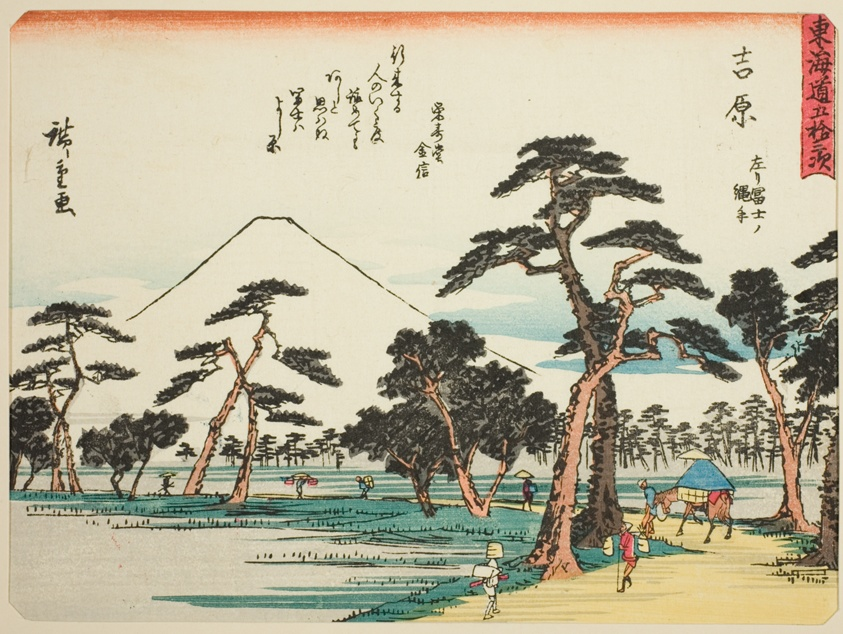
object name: Print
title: Yoshiwara: View of Fuji on the Left from Nawate (Yoshiwara, hidari Fuji no Nawate), from the series "Fifty-three Stations of the Tokaido (Tokaido gojusan tsugi)," also known as the Tokaido with Poem (Kyoka iri Tokaido)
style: Japanese (culture or style)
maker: Utagawa Hiroshige 歌川 広重; Japanese, 1797-1858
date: c. 1837/42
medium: Color woodblock print; chuban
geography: Japan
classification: woodblock print; print; asian art